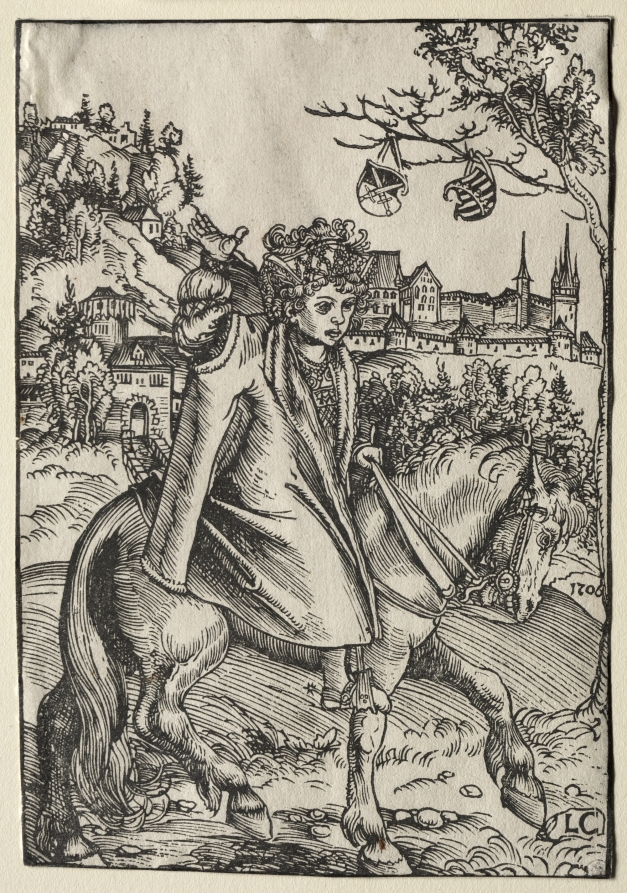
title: A Boy on Horseback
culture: Germany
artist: Lucas Cranach (German, 1472–1553)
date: 1506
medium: woodcut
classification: Print